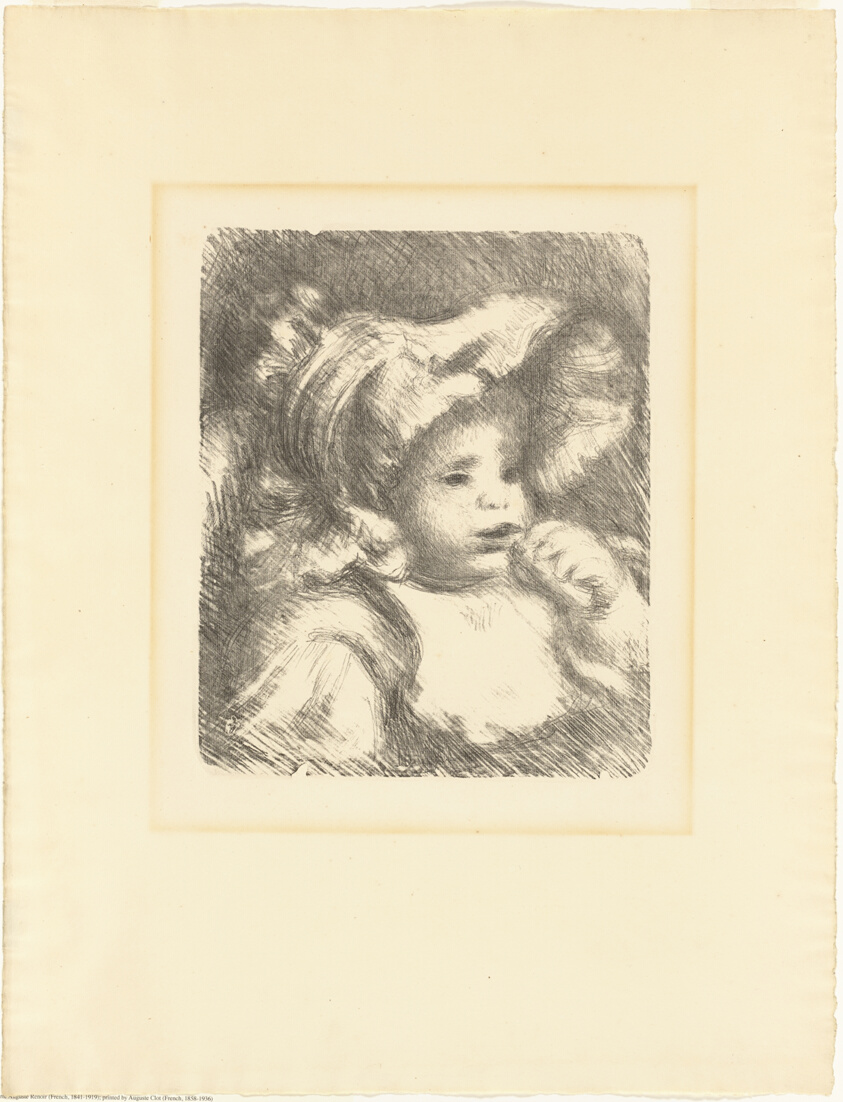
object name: Print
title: Child with a Biscuit (Jean Renoir)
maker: Pierre Auguste Renoir (French, 1841-1919); printed by Auguste Clot (French, 1858-1936)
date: 1898/99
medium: Lithograph in black on cream laid paper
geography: France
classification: lithograph; print; prints and drawing